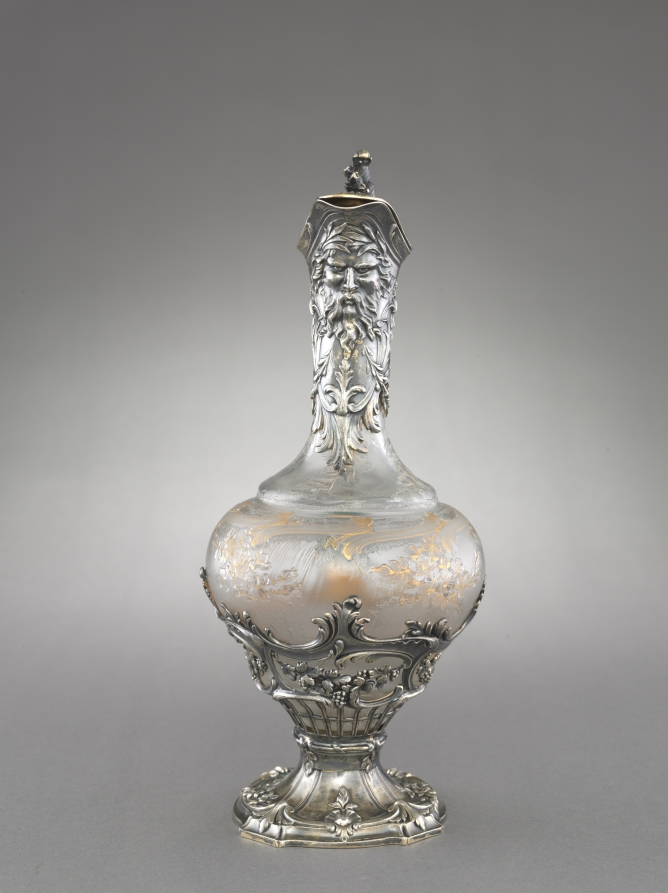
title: Wine Ewer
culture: France, 19th century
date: c. 1850–70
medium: glass with silver gilt mounts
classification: Silver